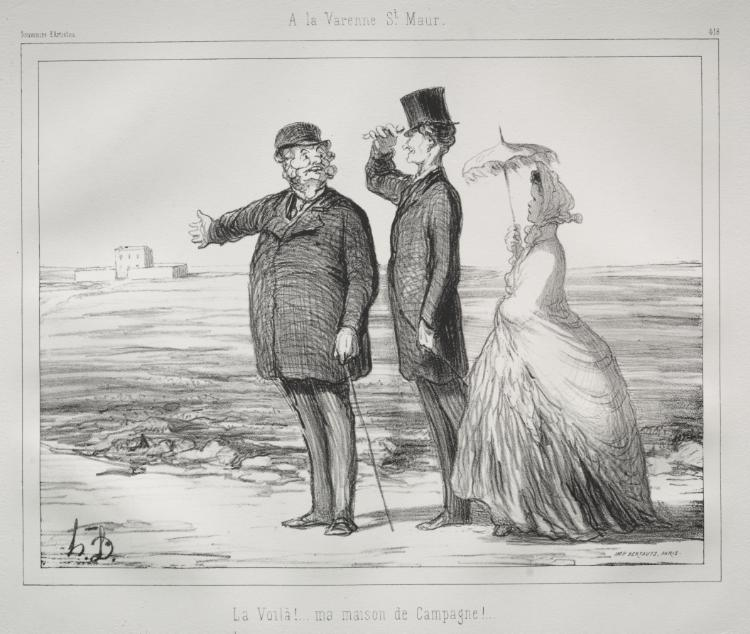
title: At Varenne, Saint-Maur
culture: France, 19th century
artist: Honoré Daumier (French, 1808–1879)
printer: Bertauts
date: 1862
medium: lithograph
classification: Print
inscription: Above image, printed: A la Varenne St. Maur. ; Lower right, printed: La Voilà!... ma maison de Campagne!...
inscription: Upper margin, printed: Souvenir d'Artistes. / 418 ; Lowe right corner of the image, in stone: IMP. BERTAUS, PARIS. ; Lower margin, pencil: 26293. / D. IX.3247 - II/II / Com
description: This print was published both in the journal Le Boulevard (May 11, 1862) and in the album Souvenirs d’Artistes (plate 418).